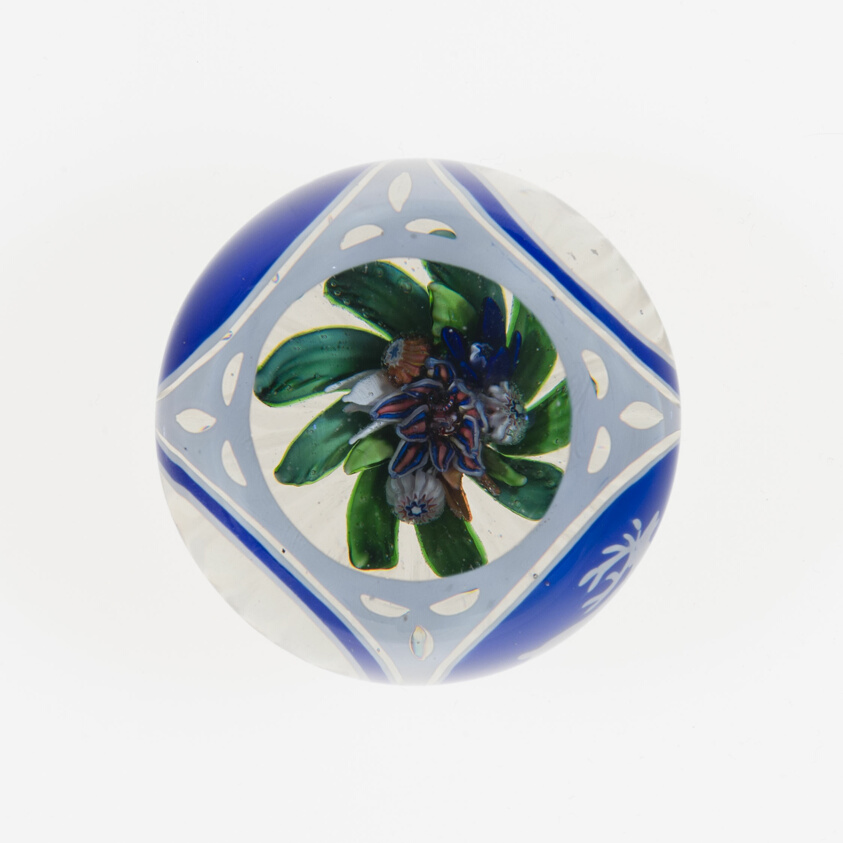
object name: Glass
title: Paperweight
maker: Saint-Louis Glassworks (Cristalleries de Saint-Louis); Lorraine, France, founded 1586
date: c. 1845–60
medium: Glass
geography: Saint-Louis-lès-Bitche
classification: paperweight; glass